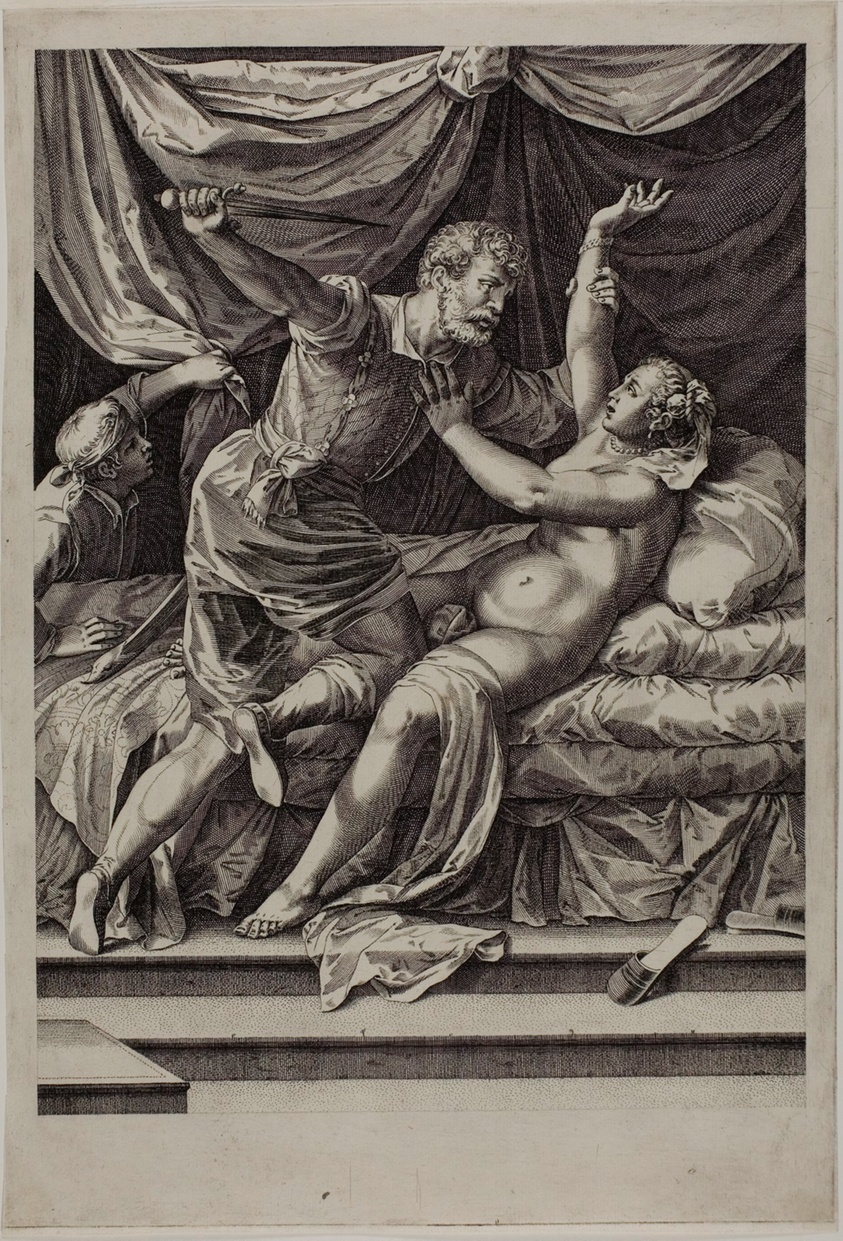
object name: Print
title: Tarquin and Lucretia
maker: Cornelis Cort (Netherlandish, 1533-before1578); after Titian (Italian, c. 1488-1576)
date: c. 1571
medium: Engraving in black on ivory laid paper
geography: Netherlands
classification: engraving; print; prints and drawing